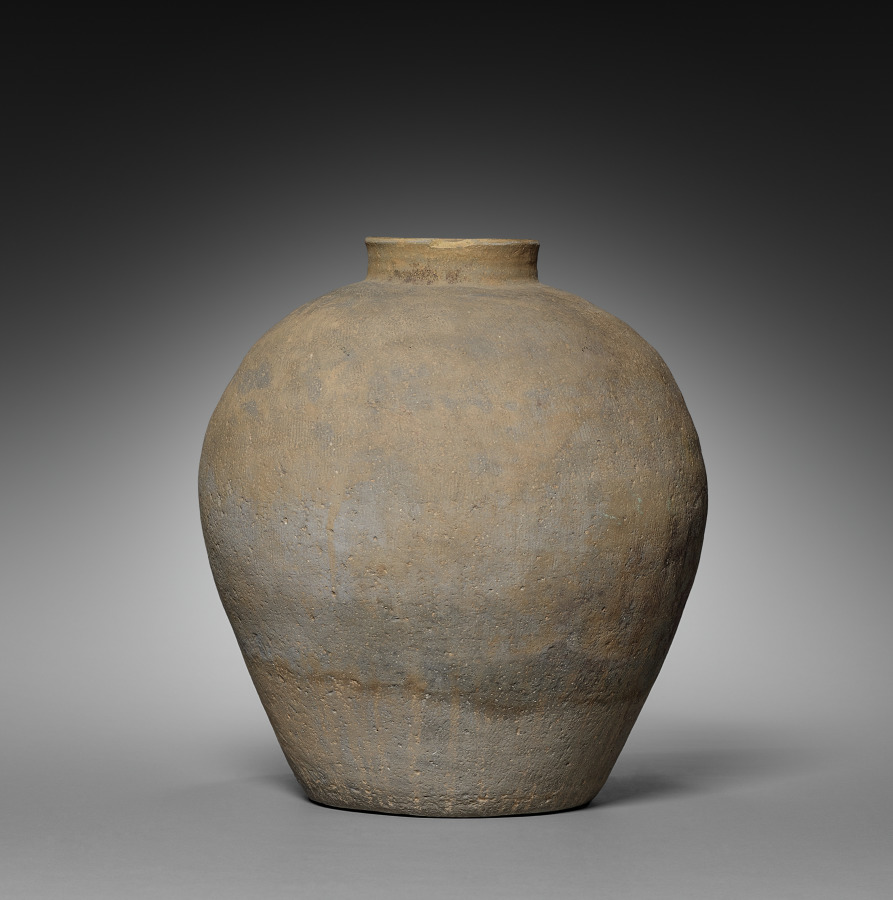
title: Burial Urn with Cover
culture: Korea, Three Kingdoms period (57 BCE–668 CE)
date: 300s–500s CE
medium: earthenware with impressed design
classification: Ceramic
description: Produced in closed kilns built on hillsides during the Three Kingdoms period, this lidded jar once contained the cremated remains of the dead. This type of burial jar became widespread after the introduction of Buddhism, as cremation became a common practice in Korea.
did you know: Closed kilns built on hillsides became widely used for producing this type of pottery vessel in Korea during the Three Kingdoms period.